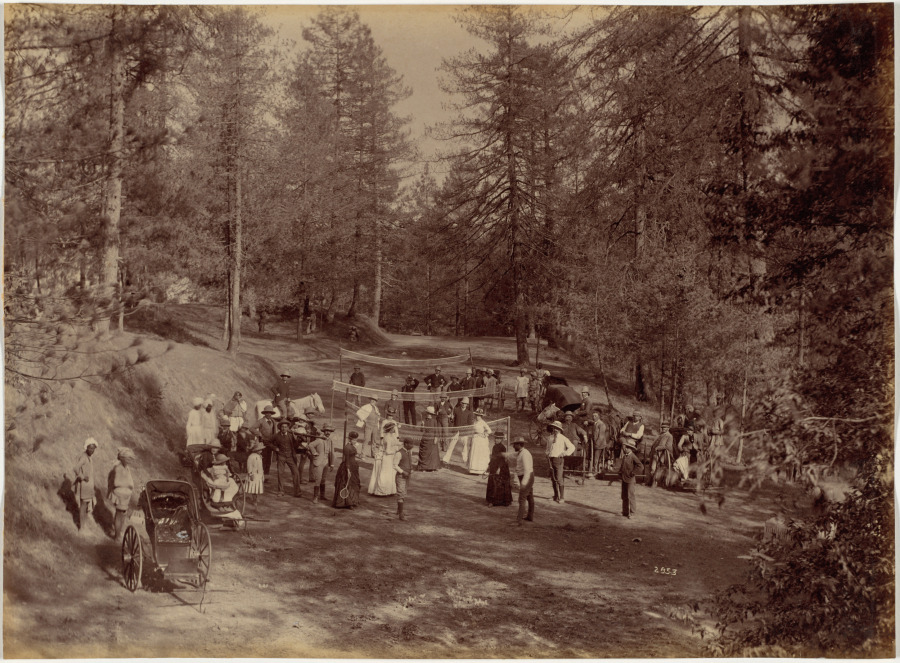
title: Badminton Party at Mashobra, Shimla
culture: India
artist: Raja Deen Dayal (Indian, 1844–1905)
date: 1887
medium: albumen print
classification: Photograph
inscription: Written in pencil on verso: “2953” Stamped in black ink on verso: “24.7.F”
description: This scene is from one of many lavish entertainments hosted by caterer, restaurateur, and hotelier Federico Peliti (Italian, 1844–1914) at his forested country estate outside Simla. In the photograph, Peliti is on horseback and his wife Judith on the swing.. Swings have a long history as items of leisurely pleasure in Europe and India. Badminton, which originated in England in 1873, was popular in India. Deen Dayal may have been invited to document this gathering because he and Peliti, an amateur photographer, both belonged to the Photographic Society of Bombay.